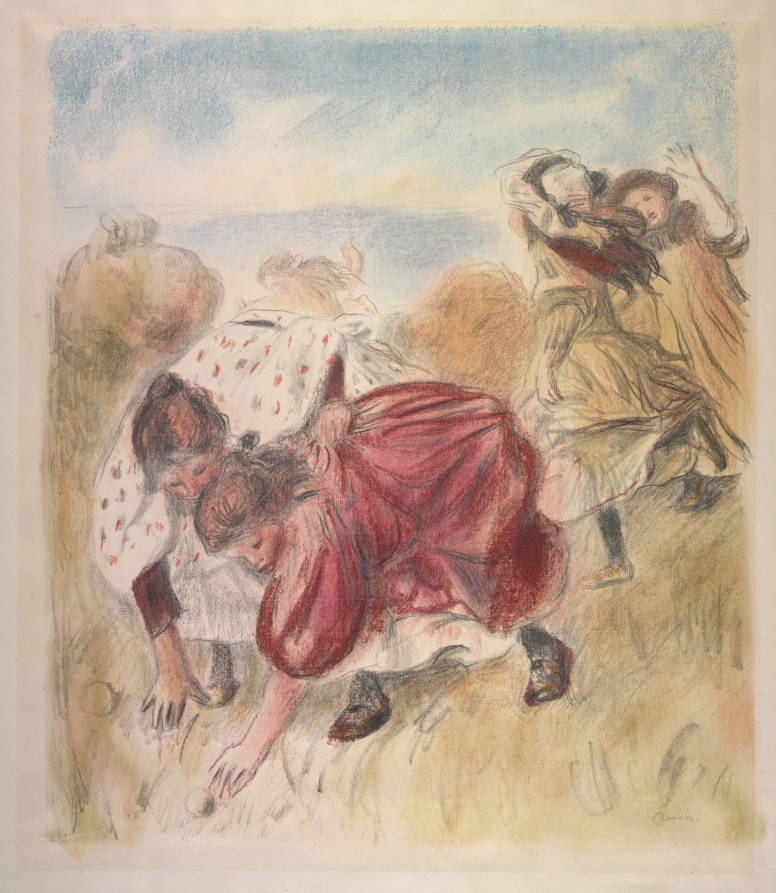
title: Children Playing Ball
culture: France, late 19th-early 20th Century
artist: Pierre-Auguste Renoir (French, 1841–1919)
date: 1900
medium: lithograph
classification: Print